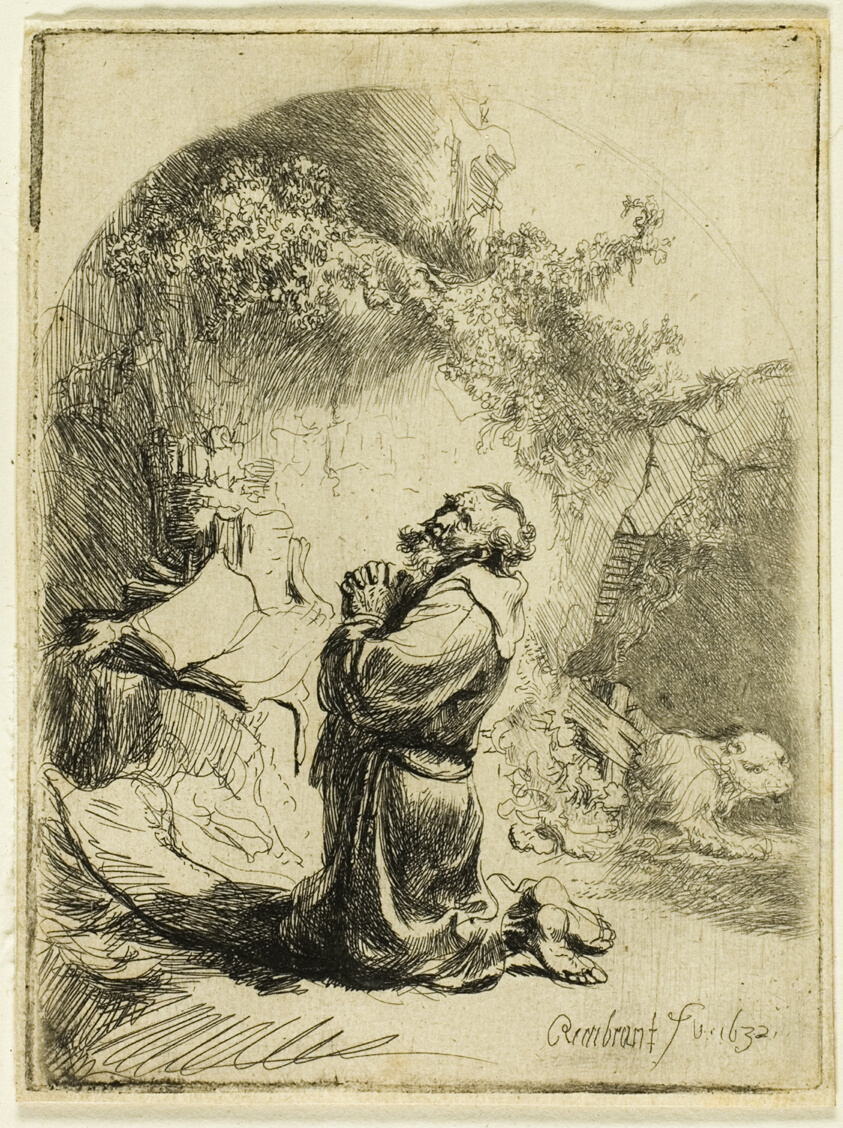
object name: Print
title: St. Jerome Praying: Arched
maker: Rembrandt van Rijn (Dutch, 1606-1669)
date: 1632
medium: Etching and drypoint on paper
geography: Holland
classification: etching; print; prints and drawing; paper; drypoint